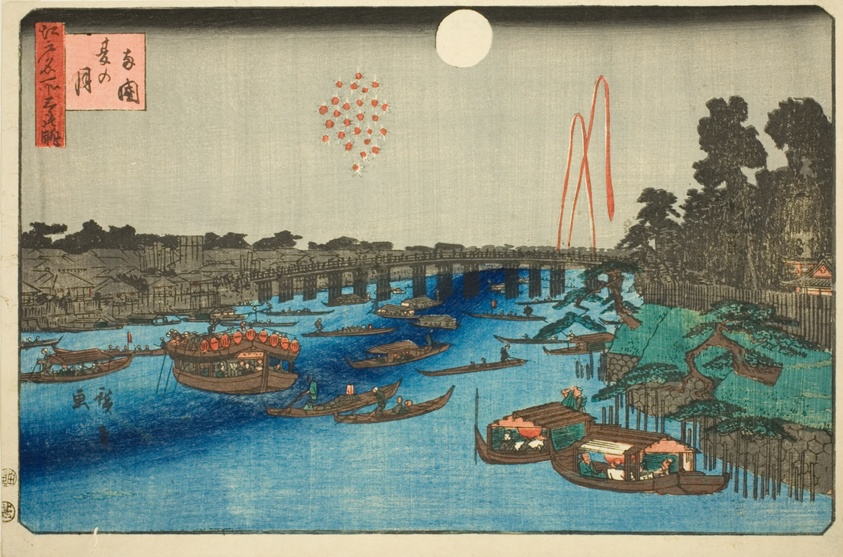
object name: Print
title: Summer Moon over Ryogoku (Ryogoku natsu no tsuki), from the series "Three Views of Famous Places in Edo (Edo meisho mittsu no nagame)"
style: Japanese (culture or style)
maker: Utagawa Hiroshige 歌川 広重; Japanese, 1797-1858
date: c. 1840s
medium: Color woodblock print; oban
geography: Japan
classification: woodblock print; print; asian art